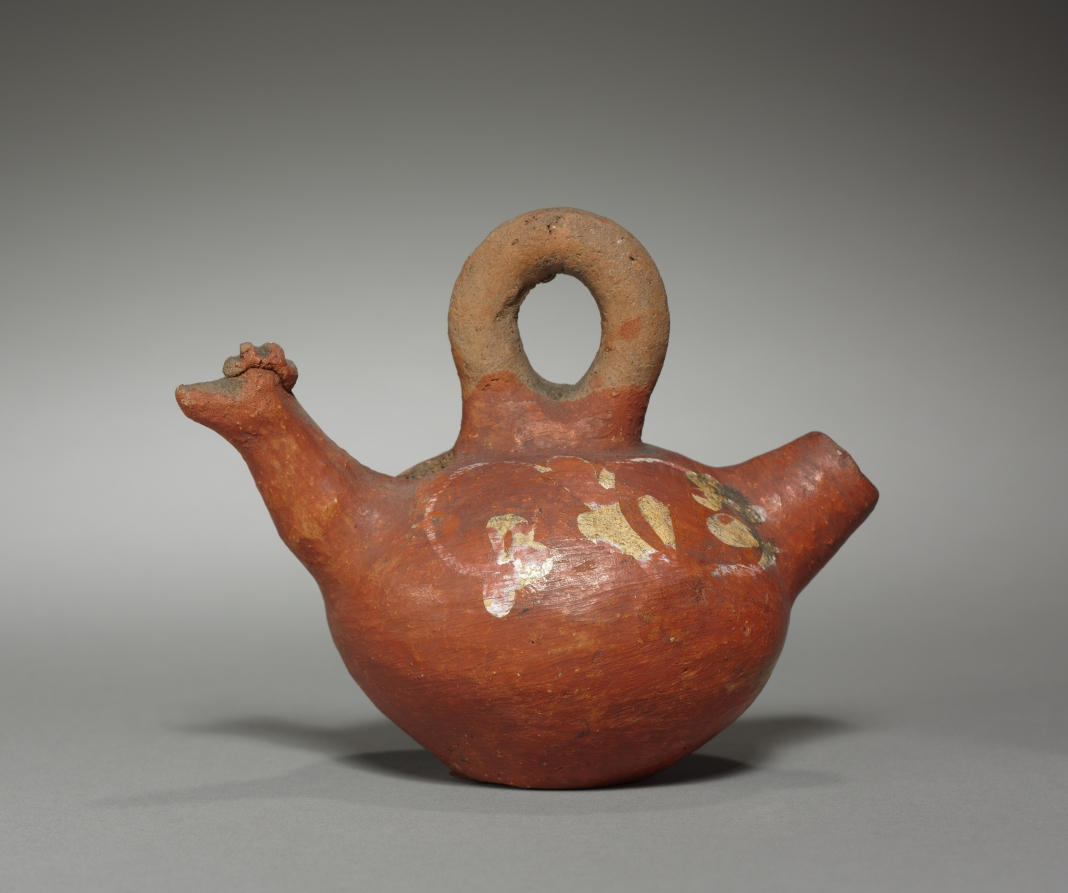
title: Bottle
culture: Peru, 20th century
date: 1900–1920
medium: pottery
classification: Ceramic